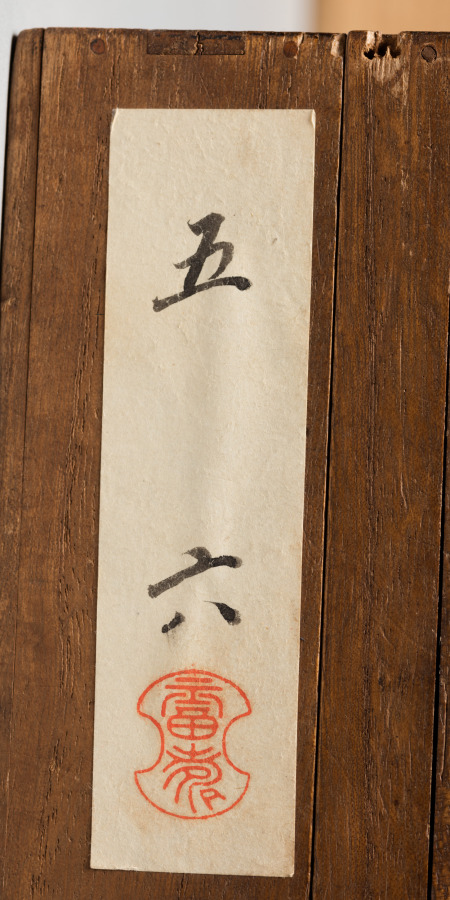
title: Gibbons Reaching for the Moon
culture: Japan, Edo period (1615–1868)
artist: Kano Tan’yū (Japanese, 1602–1674)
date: 1600s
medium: Hanging scroll; ink and light color on silk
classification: Painting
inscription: signed: "Tan'yūsai hitsu"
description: Long-armed gibbons form a chain to reach down from a tree, hoping to touch what they believe is the moon. In fact, the orb remaining beyond their grasp is the full moon’s reflection in the still surface of a pond or lake. The image is a common metaphor for the deluded mind in Buddhist thought. Gibbons do not live in Japan but were known to Japanese painters of the premodern era through paintings brought from China.